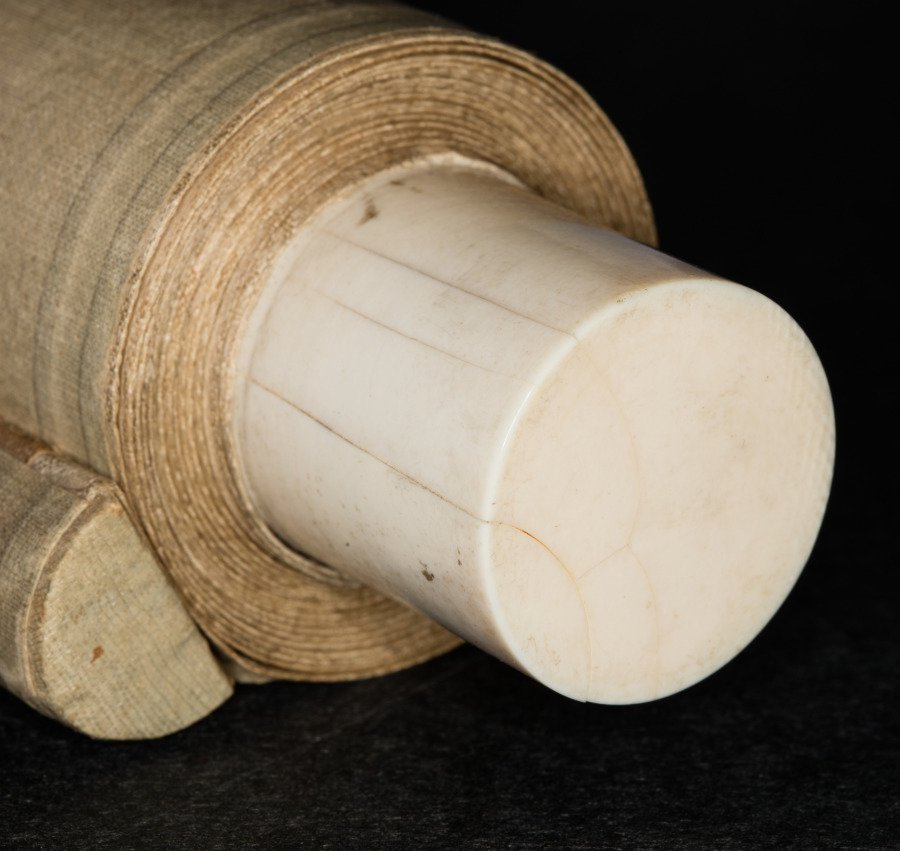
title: Symbols of Longevity: Deer under Peach and Pine (Peach) (left)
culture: Japan, Edo period (1615–1868)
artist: Toda Tadanaka (Japanese, 1761–1823)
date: 1801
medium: Pair of hanging scrolls; ink and color on silk (ivory roller ends)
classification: Painting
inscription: Lefthand painting signed: Kano no tori natsubi Fuji Gon'ei utsusu (Painted on a summer day in 1801 by Fuji Gon'ei) Lefthand painting sealed beneath signature: square red seal with patterned border above; Fujiwara, square red seal below; Tadanaka yajirushi Lefthand painting sealed lower left: rectilinear red seal unread